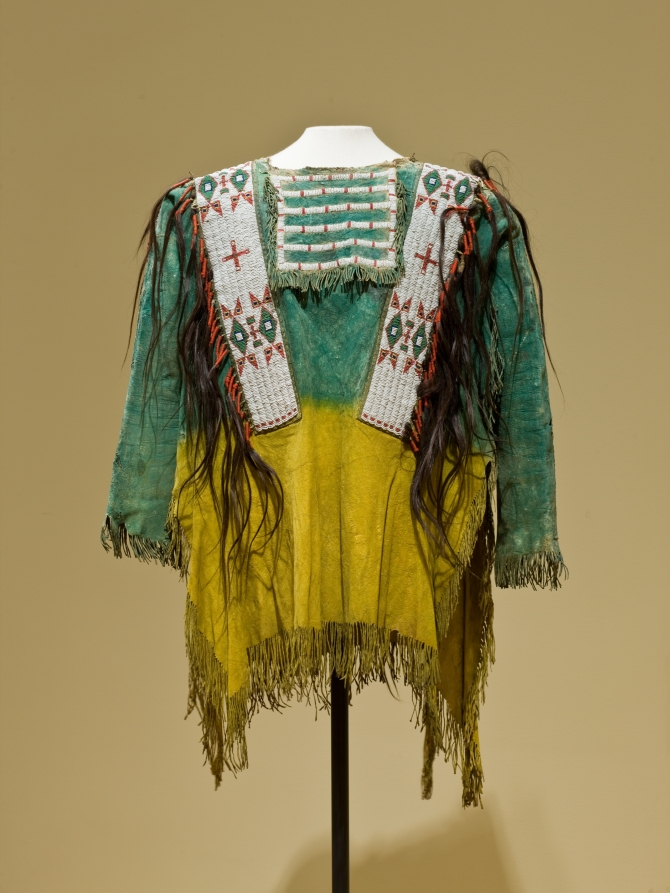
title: Hide Shirt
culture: America, Native North American, Central Plains, Lakota Sioux, 19th century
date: c. 1890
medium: hide, pigment, glass beads, human hair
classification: Textile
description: Traditionally, only Lakota (Sioux) head chiefs had the right to wear painted shirts, an honor they earned through sacrifice and bravery but lost by failing in their responsibilities. By the time this example was created, European Americans had confined the Lakota to reservations, and painted shirts had become the privilege of battle veterans rather than of active warriors. Family members probably donated the locks of hair, each representing a war exploit.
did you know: Only Lakota (Sioux) chiefs had the right to wear painted shirts, an honor they earned through bravery.